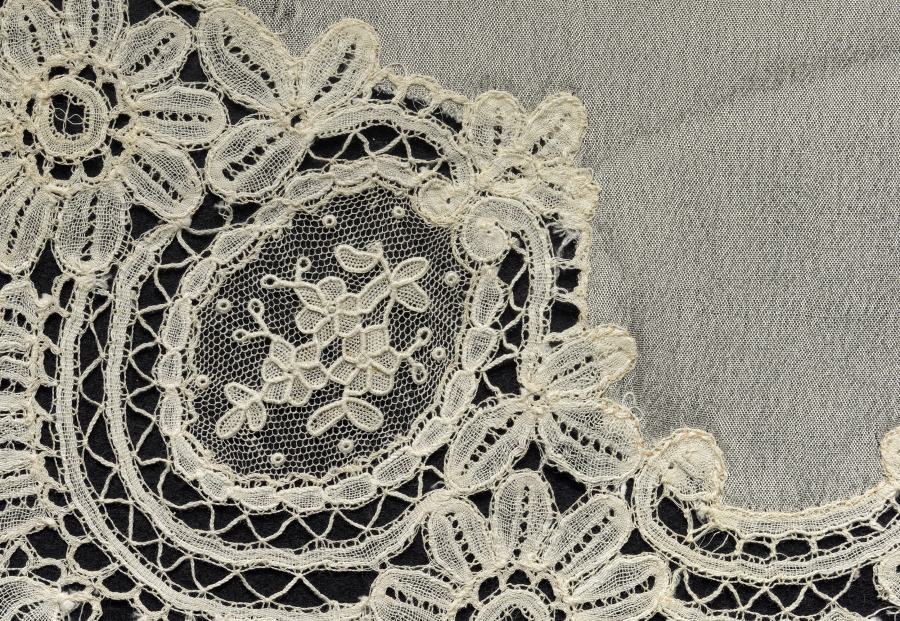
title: Lace Handkerchief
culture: Belgium, Brussels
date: 1900–1935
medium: Crêpe de chine center with border of bobbin lace (Duchesse lace) and needle lace (point de gaze)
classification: Lace